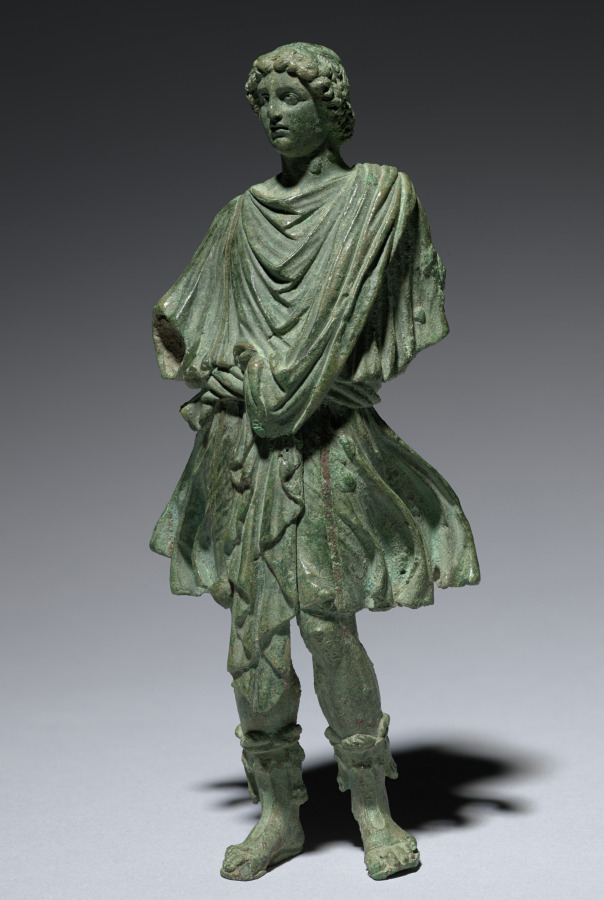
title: Lar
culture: Italy, Rome, Early Imperial period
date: 1–25 CE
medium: bronze with copper inlays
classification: Sculpture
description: This youthful bronze figure wears a short tunic with copper inlaid stripes and open-toed boots with animal-skin liners. The figure’s arms are missing, but based on other surviving examples, they likely held a libation dish and cornucopia. Even without these attributes, the figure can be identified through dress and stance as a type of Lar, or domestic deity, known as the Lar Familiaris (Household Lar), standing in a characteristic "quiet pose." Other types of Lares include the Lares Compitales and Lares Augusti (Lares of crossroads and of Augustus, respectively).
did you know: This statuette likely stood with other small bronzes in a household shrine called a lararium.